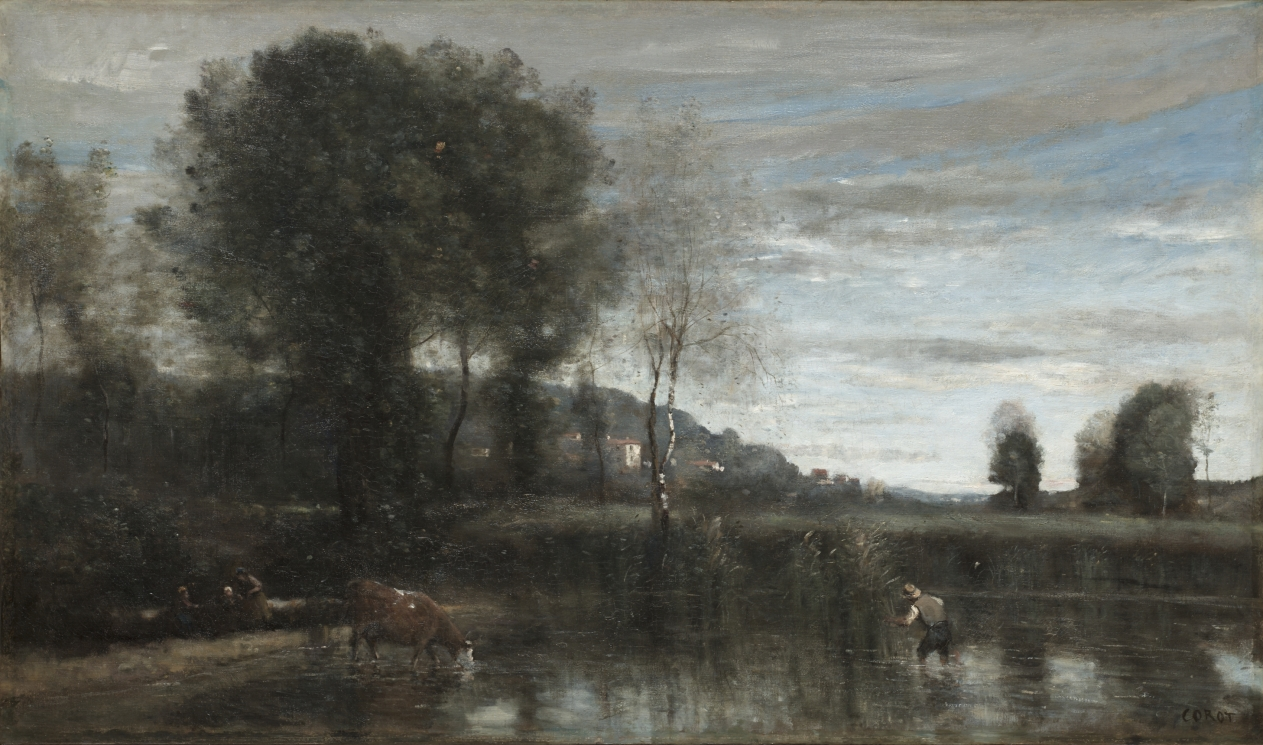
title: Pond at Ville-d'Avray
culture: France, 19th century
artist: Jean Baptiste Camille Corot (French, 1796–1875)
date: late 1860s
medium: oil on fabric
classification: Painting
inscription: Signed in black paint lower right corner: corot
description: Corot painted this view of a pond near his home at Ville-d'Avray, just west of Paris, in his late style distinguished by soft, hazy forms and gentle, silvery light. Such paintings merge his lifelong study of nature with nostalgic memories and contrast sharply with the more formal compositions and precisely rendered shapes of his early landscapes. Corot's devotion to the direct study of nature was a major influence on the Impressionists.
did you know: The dreamlike quality of the painting reflects Corot’s desire to reproduce the “first Impression” of the landscape.